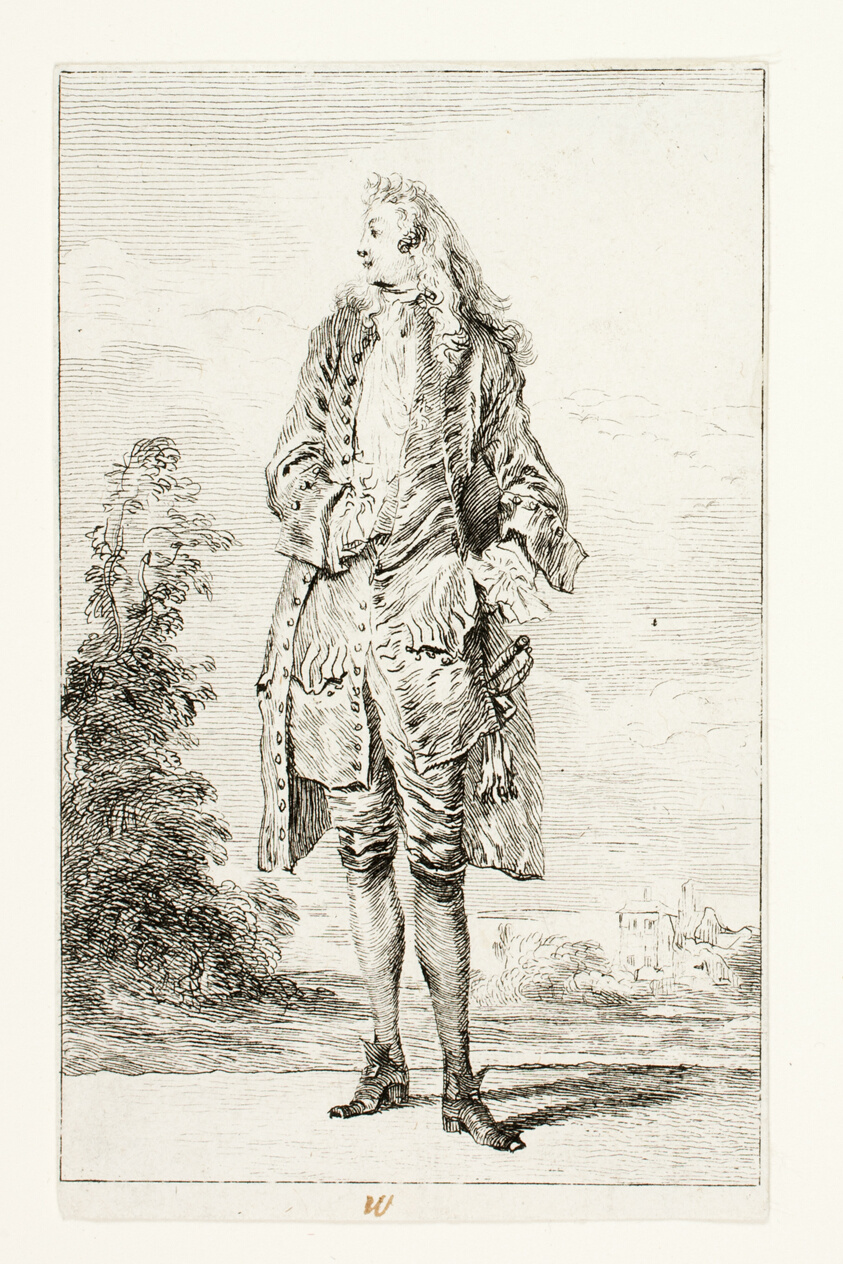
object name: Print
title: Standing Man with Hand in Vest, from Figures de Modes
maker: Jean Antoine Watteau (French, 1684-1721)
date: c. 1710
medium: Etching on ivory laid paper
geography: France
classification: etching; print; prints and drawing